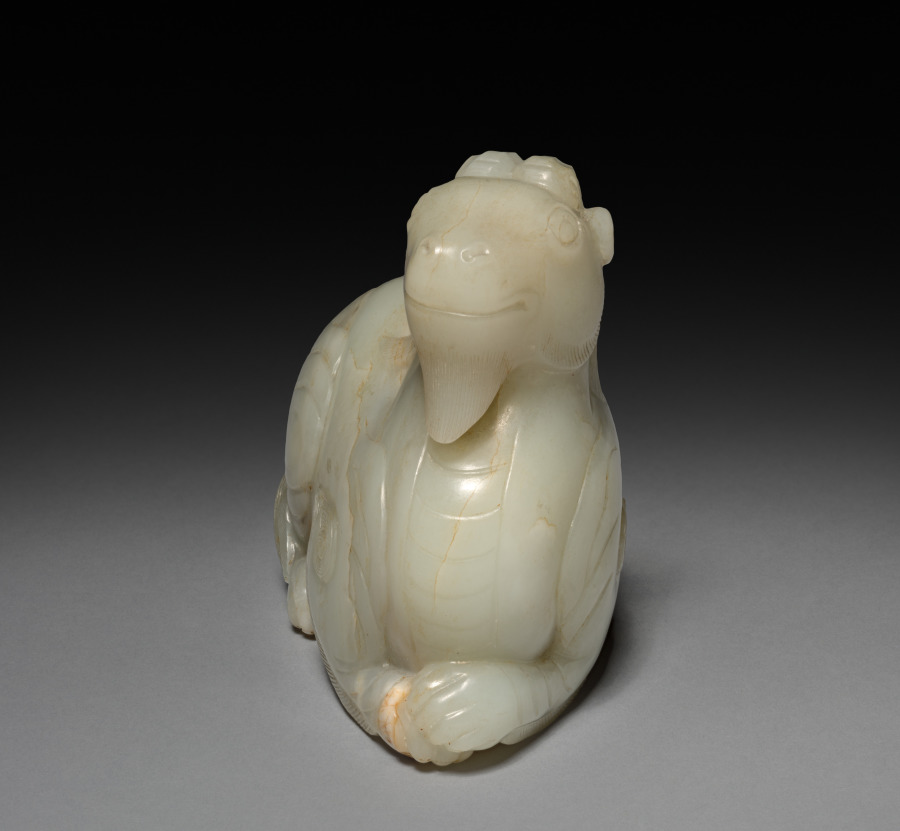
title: Fantastic Animal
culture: China, Qing dynasty (1644-1911)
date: 1700s–1800s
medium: jade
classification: Jade